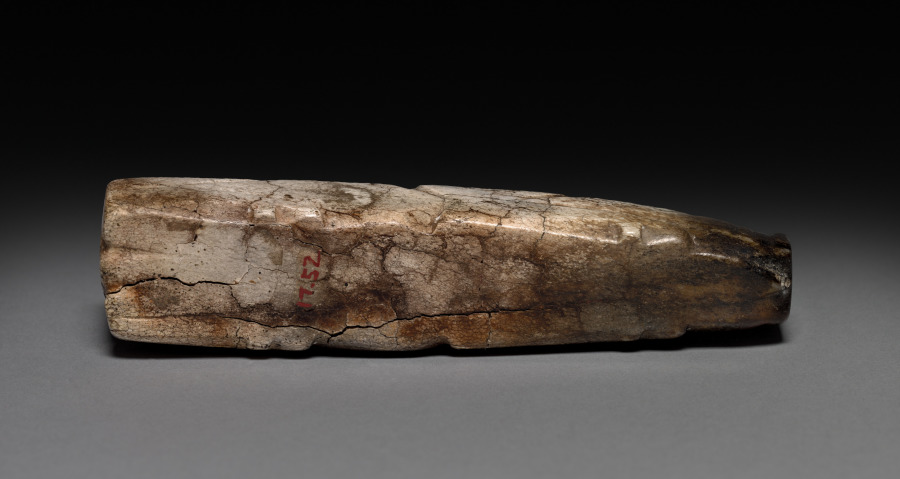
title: Pig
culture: China, Zhou dynasty (c. 1046–256 BCE)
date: 1045–256 BCE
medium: jade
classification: Jade